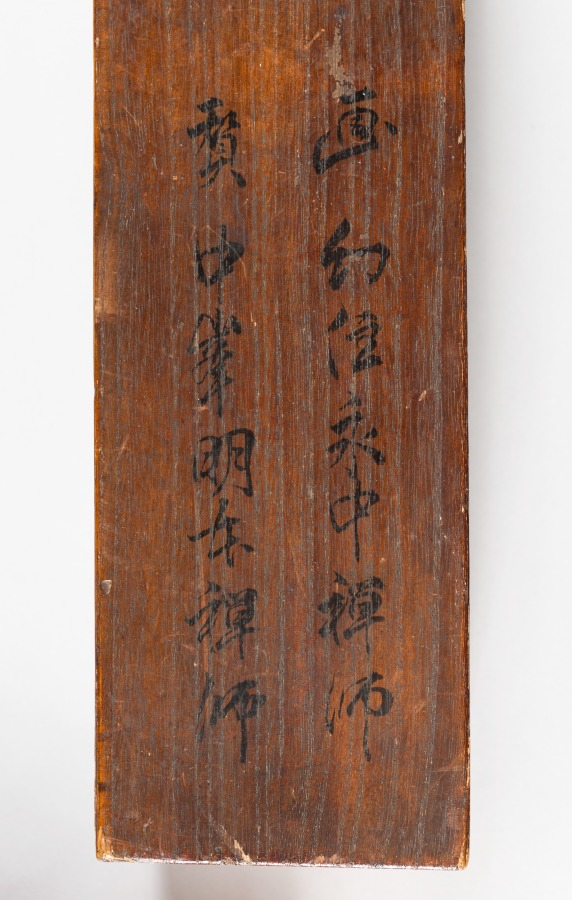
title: White-Robed Guanyin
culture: China, Yuan dynasty (1271-1368)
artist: Jueji Yongzhong (Chinese, active around 1300)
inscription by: Zhongfeng Mingben (Chinese, 1263–1323)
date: late 1200s–early 1300s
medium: hanging scroll; ink on paper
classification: Painting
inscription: Artist's signature: Huanzhu Yongzhong. Inscription by Zhongfeng Mingben: The right thinking [Samkalpa] is embodied within His deep meditation on the Buddha [naga-samadhi]. Retaining not even one single object of thought, A perfect harmony was wonderfully achieved. In the endless time and space, His all-embracing compassion prevails. [signed] Mingben of Huanzhu paying his respects.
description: Guanyin, the bodhisattva of infinite compassion (Avalokiteshvara, in Sanskrit), reveals himself in many forms. According to Buddhist belief, one such manifestation is the white-robed Guanyin sitting on a rock on the island of Putuo (Potalaka, in Sanskrit), located along the coast not far from Ningbo, in Zhejiang Province, China. Here, the figure was swiftly drawn in only a few ink lines. The inscription above is by Zhongfeng Mingben, perhaps the most widely respected and influential Chan (Zen in Japanese) master in the Yuan dynasty. The artist’s signature is a single line below on the left: Huanzhu Yongzhong.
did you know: The CMA collection includes a drawing by a Japanese priest, CMA 1978.47.2, inspired by this composition.